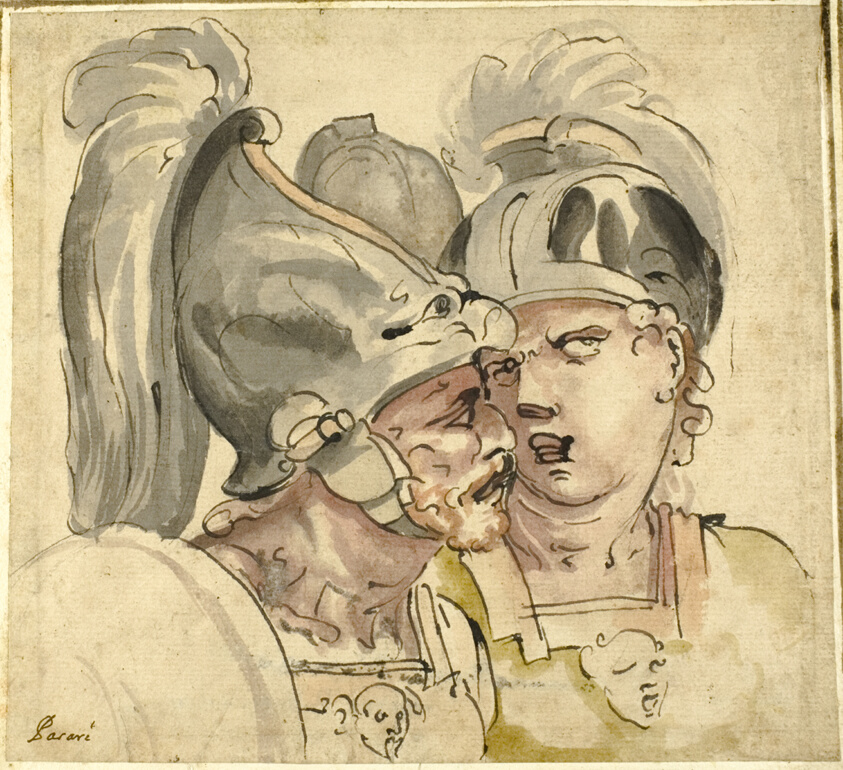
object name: Drawing and Watercolor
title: Two Helmeted Soldiers Conversing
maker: Possibly Giuseppe Passeri; Italian, 1654-1714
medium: Pen and black ink on buff laid paper, tipped onto false margins of cream wove paper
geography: Italy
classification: pen and ink drawings; drawings (visual works); prints and drawing